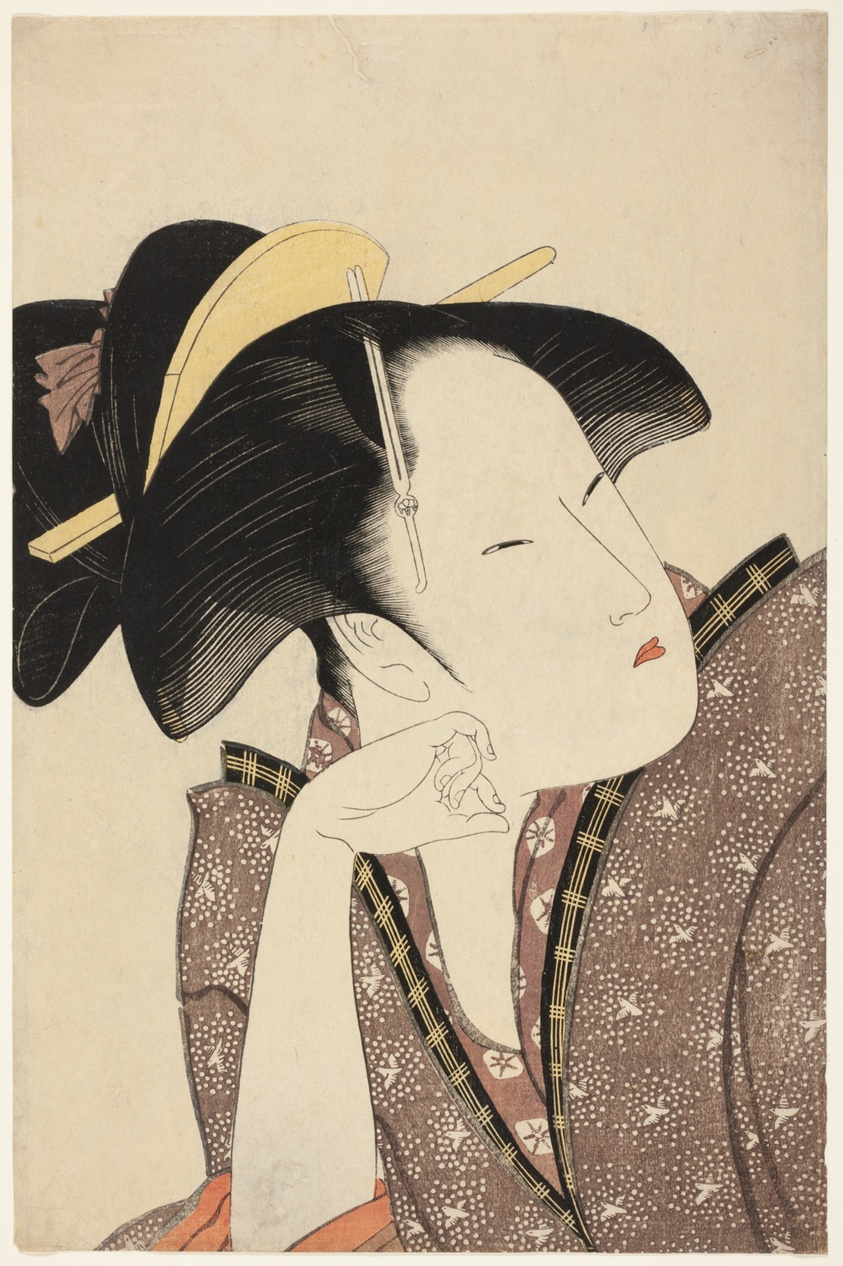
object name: Print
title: Reflective Love, from the series "Anthology of Poems: The Love Section (Kasen koi no bu) (Mono-omou koi)"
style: Japanese (culture or style)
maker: Kitagawa Utamaro 喜多川 歌麿; Japanese, 1753 (?)-1806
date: c. 1793/94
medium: Color woodblock print, oban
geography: Japan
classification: woodblock print; print; asian art